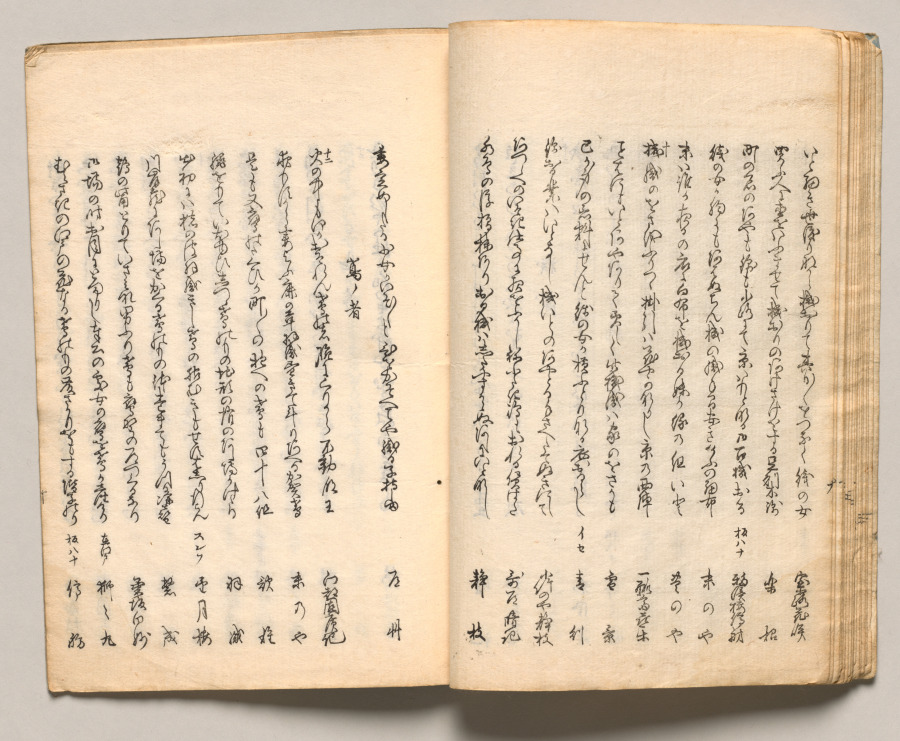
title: Spread Seventeen from Volume Two of People of Japan in Light Verse (Kyōka)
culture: Japan, Edo period (1615–1868)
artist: Utagawa Hiroshige (Japanese, 1797–1858)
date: 1857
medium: Woodblock-printed book; ink and color on paper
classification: Bound Volume